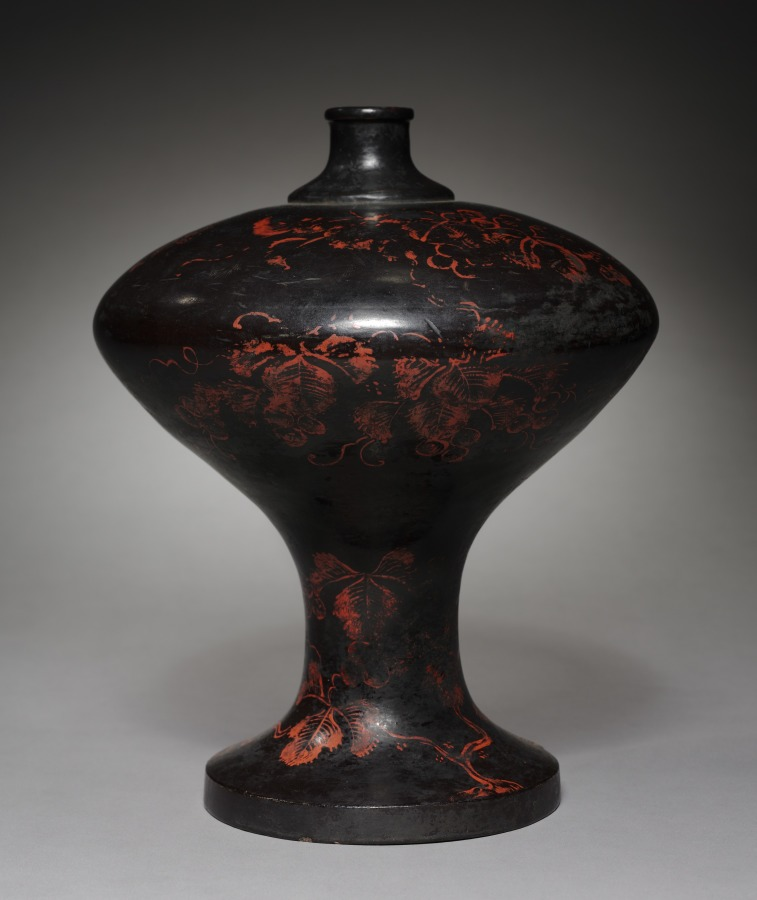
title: Sake Flask (pair)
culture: Japan, Muromachi period (1392–1573)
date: 1500s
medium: Black laquered wood with red lacquer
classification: Lacquer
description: This flask contained rice wine, or sake. Its wood body was shaped by a lathe before black lacquer was applied to the surface. A red lacquer design of grapevines, an auspicious motif, covers the surface. With their numerous, long-lasting fruits, grapevines traditionally symbolized fertility and longevity in East Asia.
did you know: The evocative imagery of brushed leaves and bunches of grapes suggest that the artist referred to a particular painting when decorating this vase.